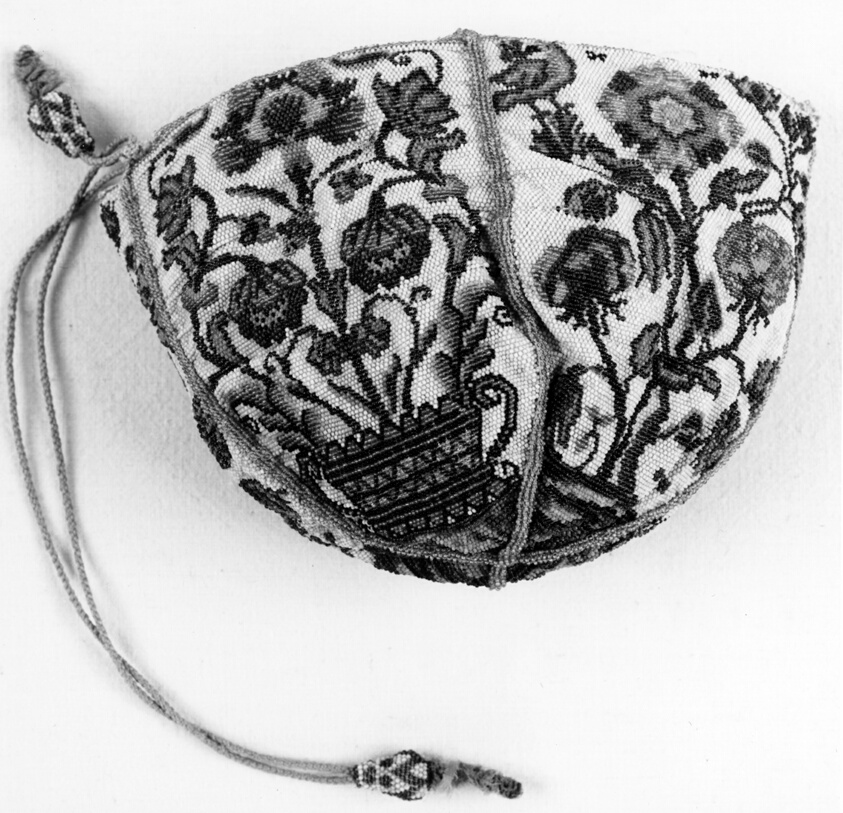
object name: Costume and Accessories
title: Bag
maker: France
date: 18th century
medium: Silk, simple looping and twisted looping; beaded with glass beads; backed with linen, plain weave; embroidered with silk floss in half cross stitches; drawstring: silk, square braid with simple looping; beaded; and tassel of silk, plain weave strips wrapped, looped and cut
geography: France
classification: textile; bag - needlework; costume accessory - bag; costume